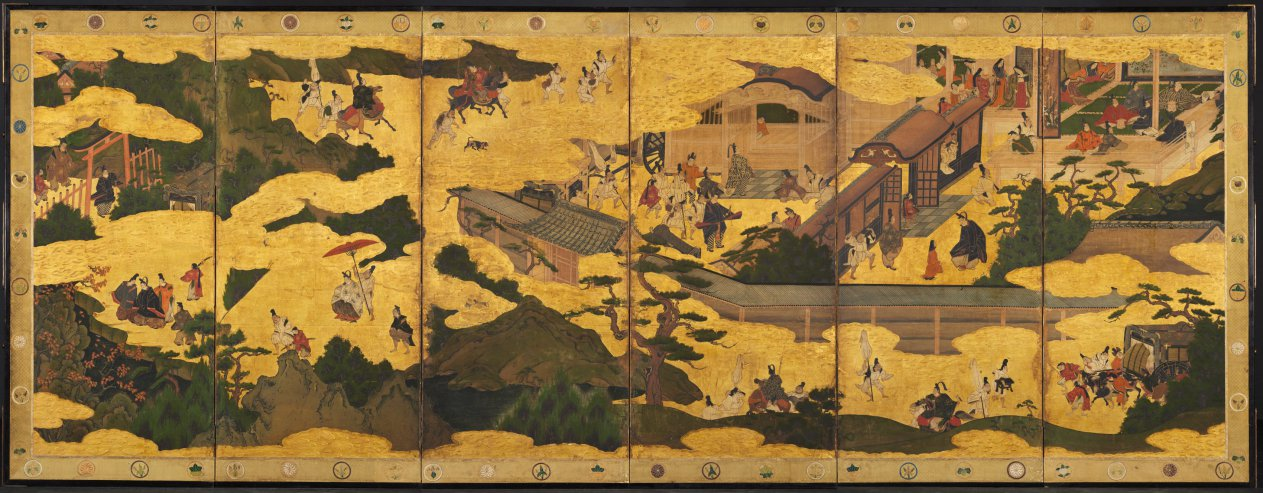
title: Scenes from the Tales of Ise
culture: Japan, Edo period (1615–1868)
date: mid-1600s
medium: One of a pair of six-panel folding screens; ink, color and gold on paper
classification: Painting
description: While the 11th-century Tale of Genji is universally regarded as Japan's literary masterpiece, the source for visual imagery in Japanese culture is rivaled by another literary classic, the Tales of Ise. A 10th-century anthology of poems interspersed with commentary, the Ise portrays the emotional and geographical journey of a courtier from the capital (Kyoto) into the countryside and beyond. The poems describe features of the natural, untamed terrain, linking them to the rather melancholy state of the traveler. Since the Tales of Ise was—and remains today—well read by educated Japanese, a person viewing these folding screens would immediately recognize its subject, organized as a series of discrete scenes read from right to left. Neither a signature nor a seal identifies the artist, but judging from related paintings, the work can be ascribed to an artist working in Kyoto during the first quarter of the 17th century in the manner of the painter Iwasa Matabei (1578–1650). This type of historical narrative composition became quite popular around 1600 among patrons favoring a distinctly Japanese style of painting which employed rich mineral pigments and a liberal use of gold.